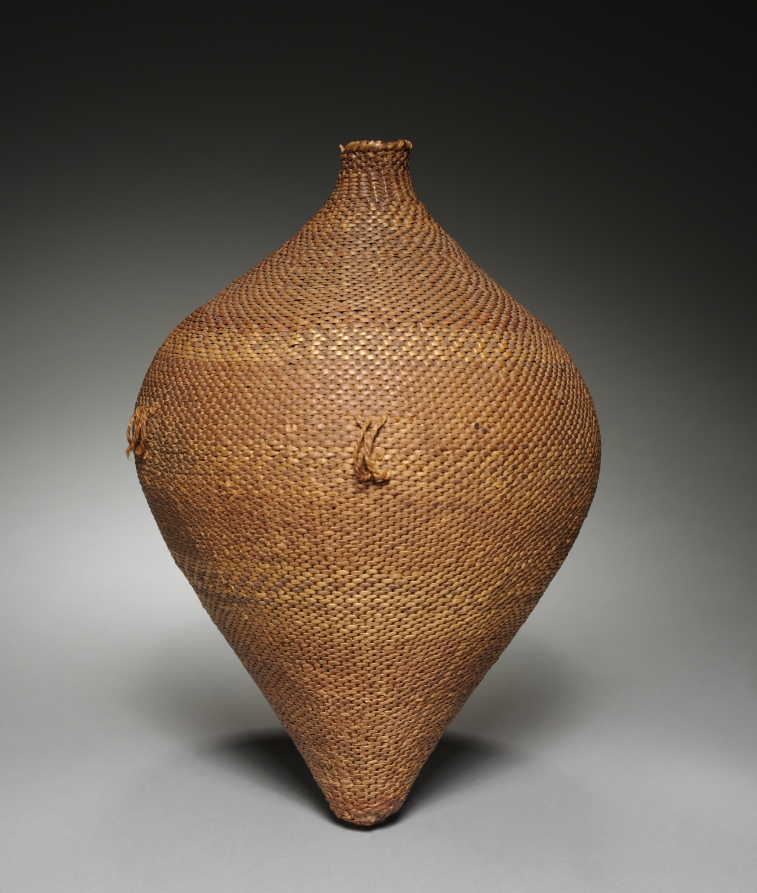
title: Seed Storage Jar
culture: Great Basin, Paiute, Kern County, Unassigned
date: Unassigned, before 1917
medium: peeled and unpeeled willow, diagonal twine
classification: Basketry